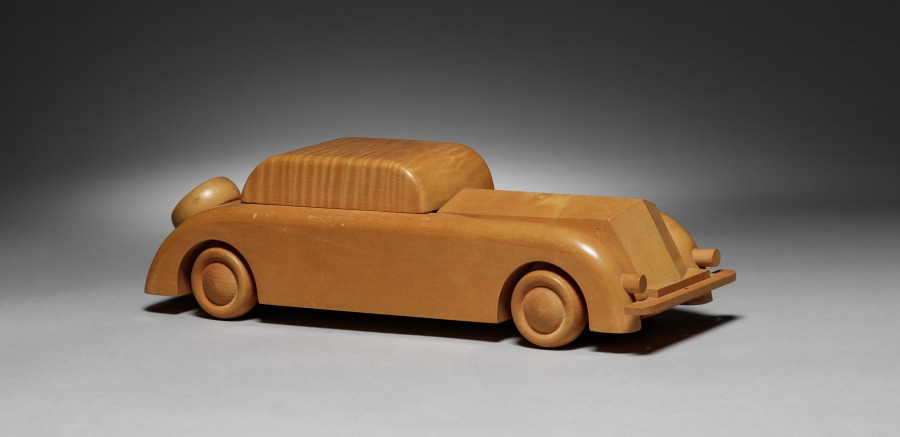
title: Streamline Automobile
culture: Denmark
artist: Boysen Toys (Danish)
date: 1900s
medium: wood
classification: Wood